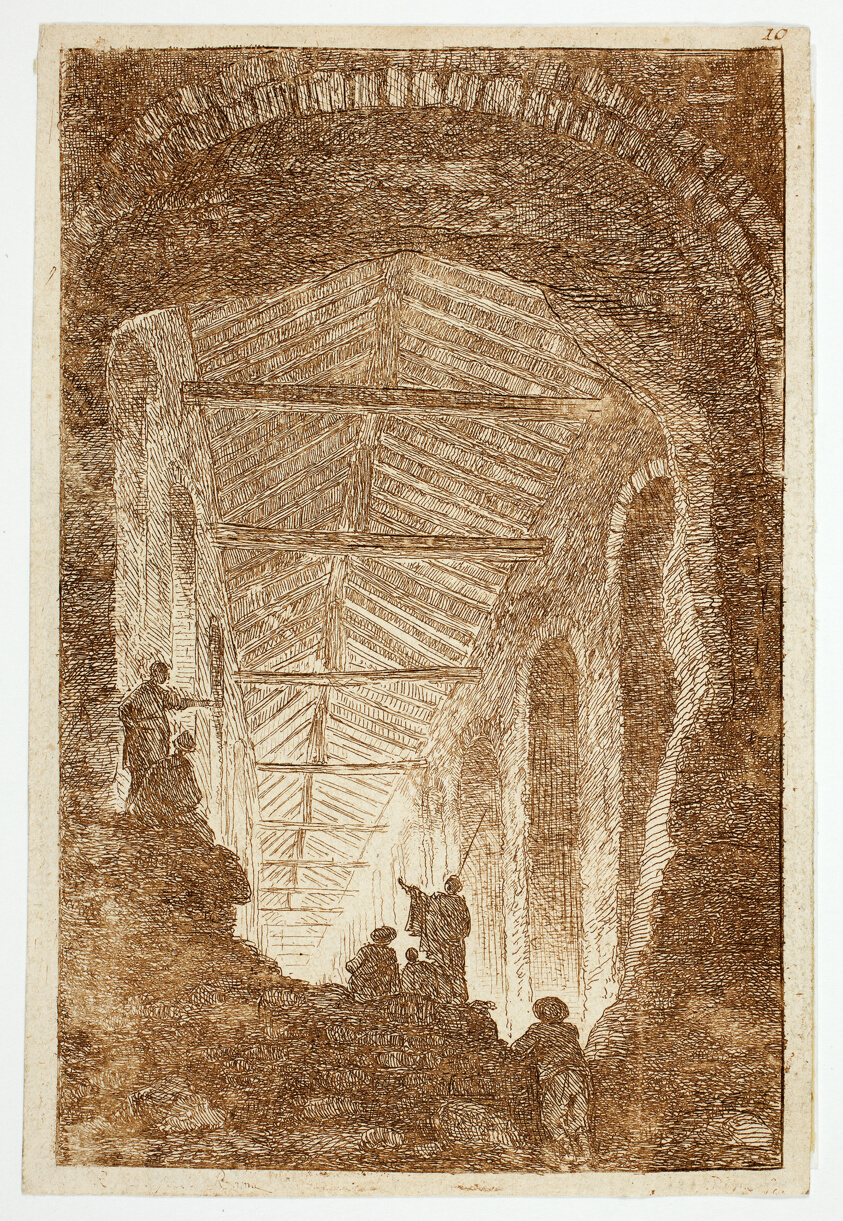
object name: Print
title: The Antique Gallery, plate ten from Les Soirées de Rome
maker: Hubert Robert (French, 1733-1808)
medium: Etching on paper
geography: France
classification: etching; print; prints and drawing